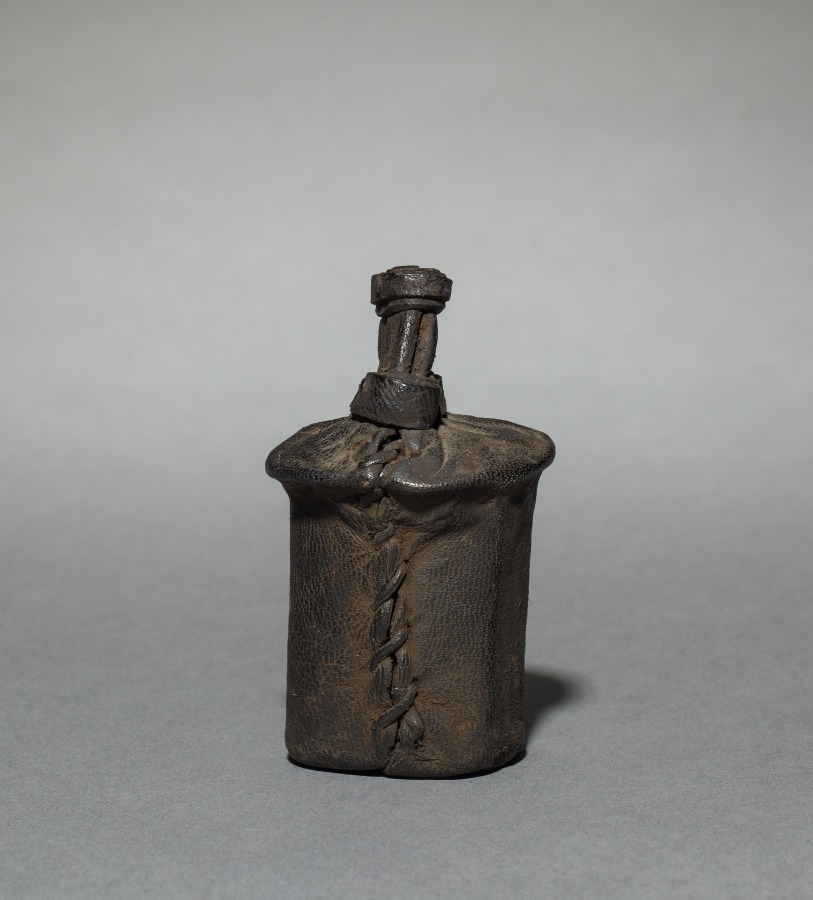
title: Stopper for Ten Nesting Wedding Baskets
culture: Africa, Western Sudan, Burkina Faso, Lobi, 20th century (?)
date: c 1900s ?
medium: Plant fiber and leather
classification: Vessels